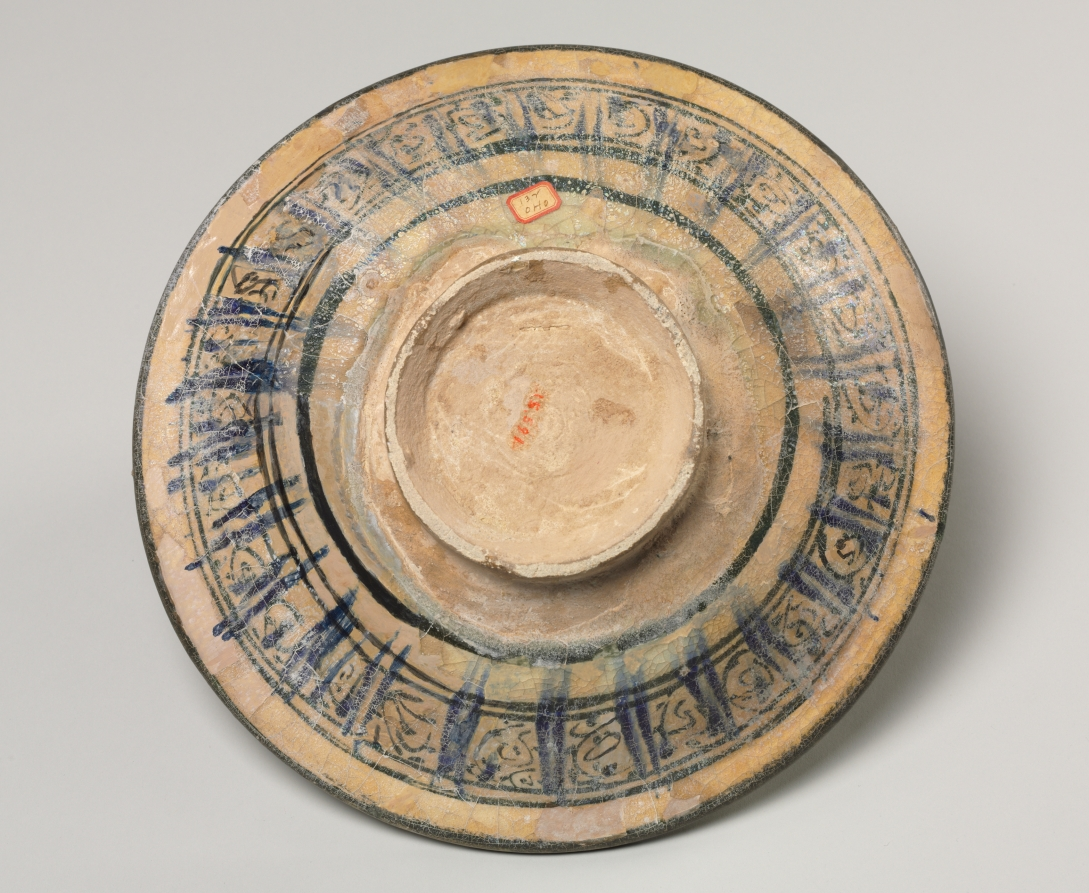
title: Bowl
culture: Iran, probably Sultanabad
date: 1300–1350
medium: fritware with underglaze-painted design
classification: Ceramic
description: Sultanabad wares were the first new type of pottery made in Iran after the Mongol conquest. These underglaze painted wares are characterized by a somber color scheme of gray, black, and white. The name "Sultanabad" comes from the modern city near which they were first discovered. This type of pottery was widely exported, perhaps even imitated, for it has been excavated over a vast area from central Asia to Egypt.